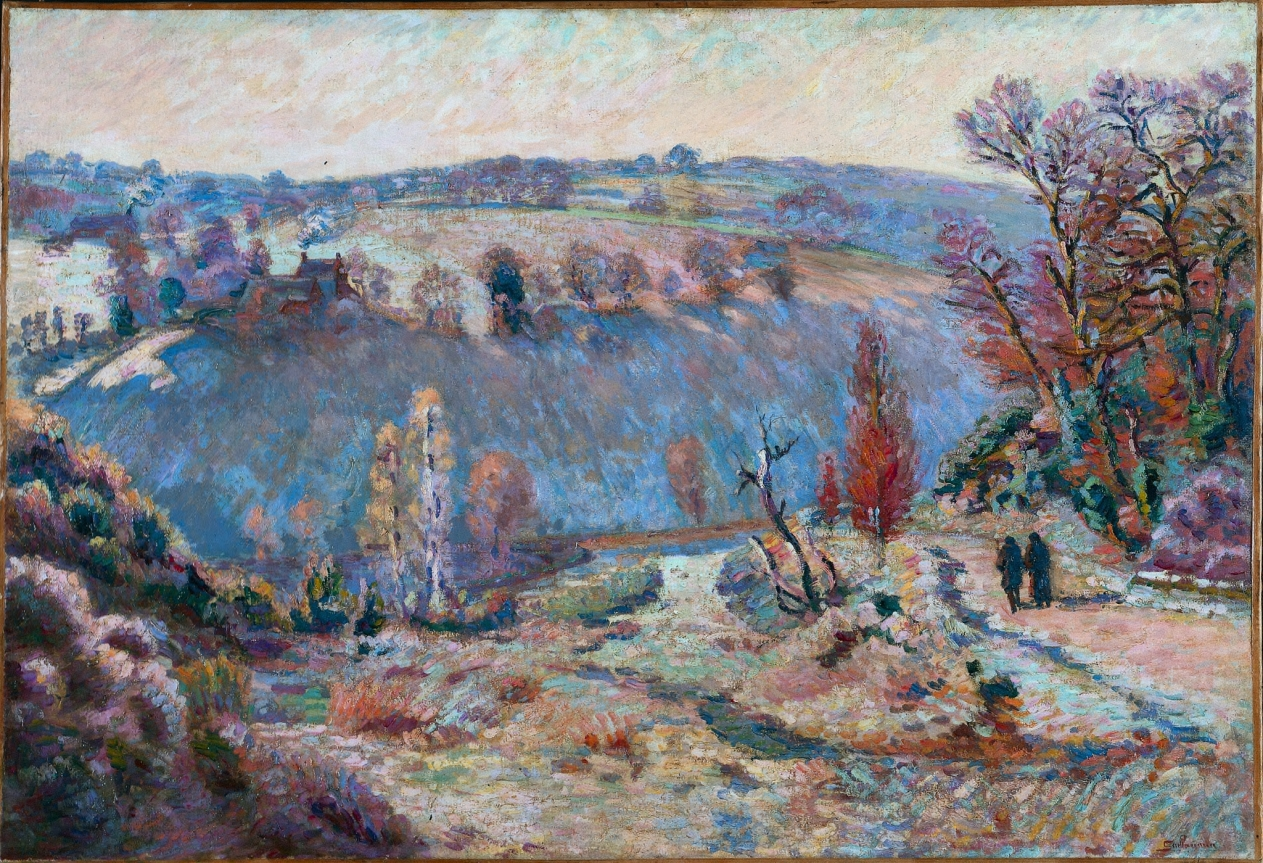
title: Valley of the Sédelle at Pont Charraud: White Frost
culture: France, late 19th-early 20th century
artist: Armand Guillaumin (French, 1841–1927)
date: c.1903–1911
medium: oil on fabric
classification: Painting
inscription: Signed lower right: Guillaumin